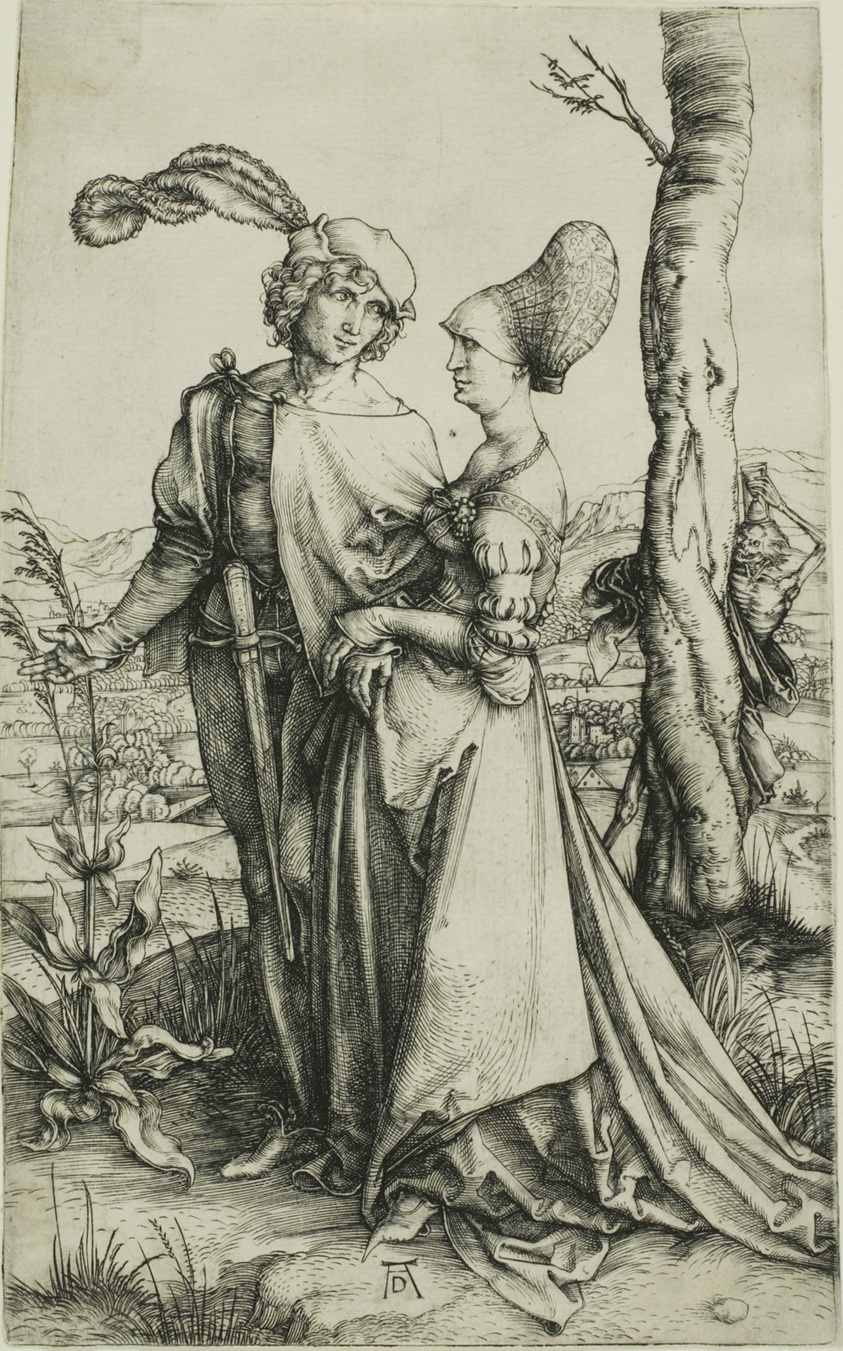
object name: Print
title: Young Couple Threatened by Death (The Promenade)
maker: Albrecht Dürer (German, 1471-1528)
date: about 1498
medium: Engraving in black on ivory laid paper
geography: Germany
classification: engraving; print; prints and drawing; paper